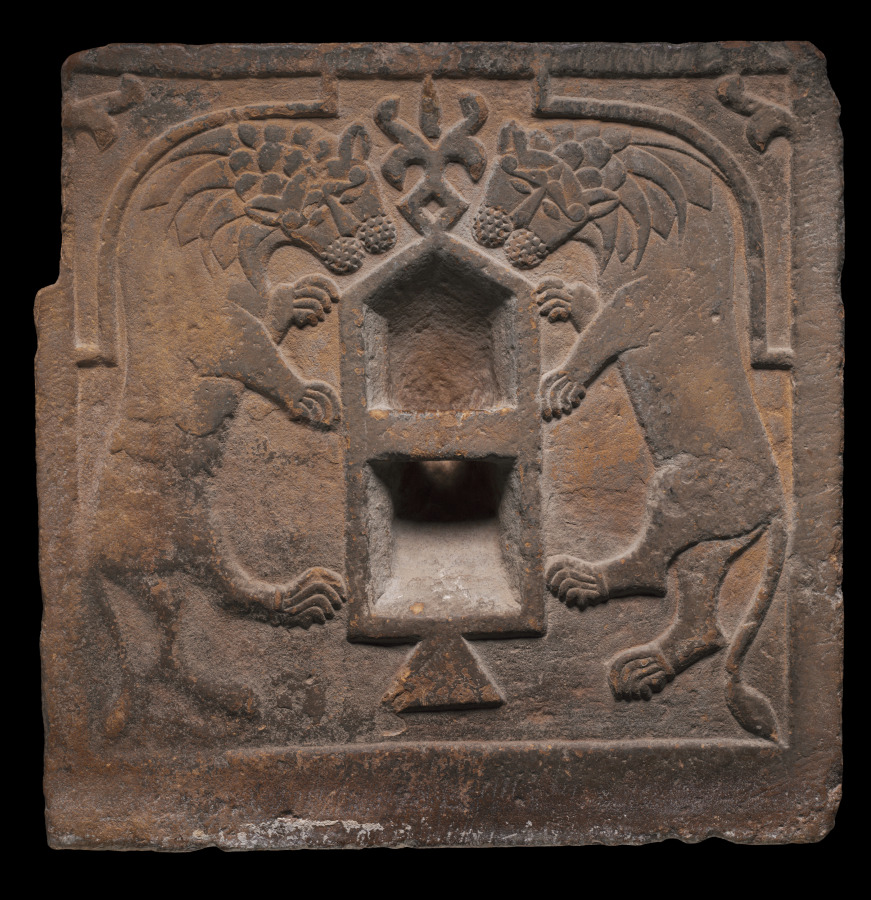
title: Hitching Post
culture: Iran, possibly Hamadan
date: 1200s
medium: limestone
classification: Sculpture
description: Two powerful lions appear to guard the central hitching ledge to which travelers and merchants could secure their horses and other animals, possibly at a caravanserai, predecessor of the modern motel, located along trade routes such as the Silk Road. Animals and human figures are often represented in art made in Islamic countries, but they are not portrayed on items associated with the Muslim faith—the Qur'an, mosques, and prayer rugs.